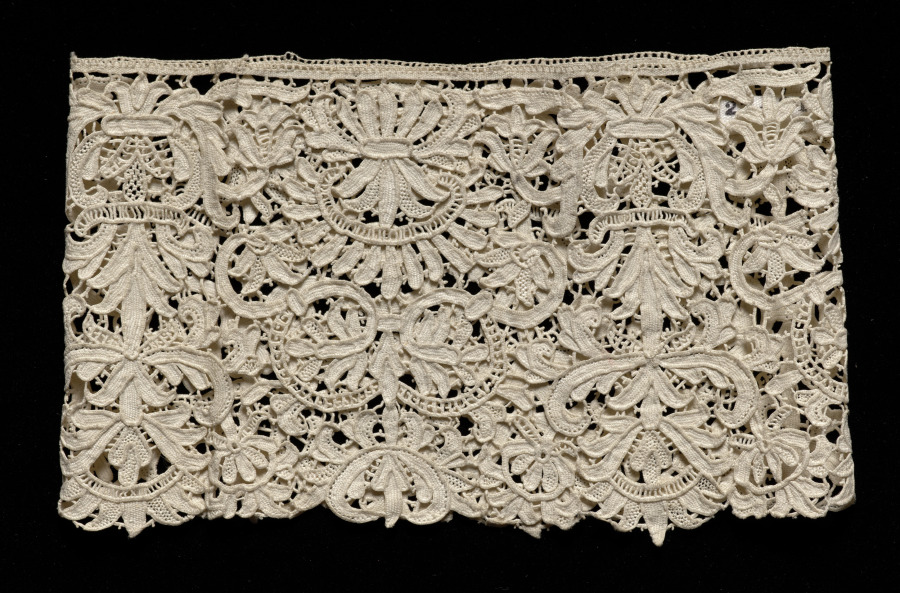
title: Lace Cuff (one of a pair)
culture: Italy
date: 1600–1640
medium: Needle lace (punto in aria)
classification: Lace